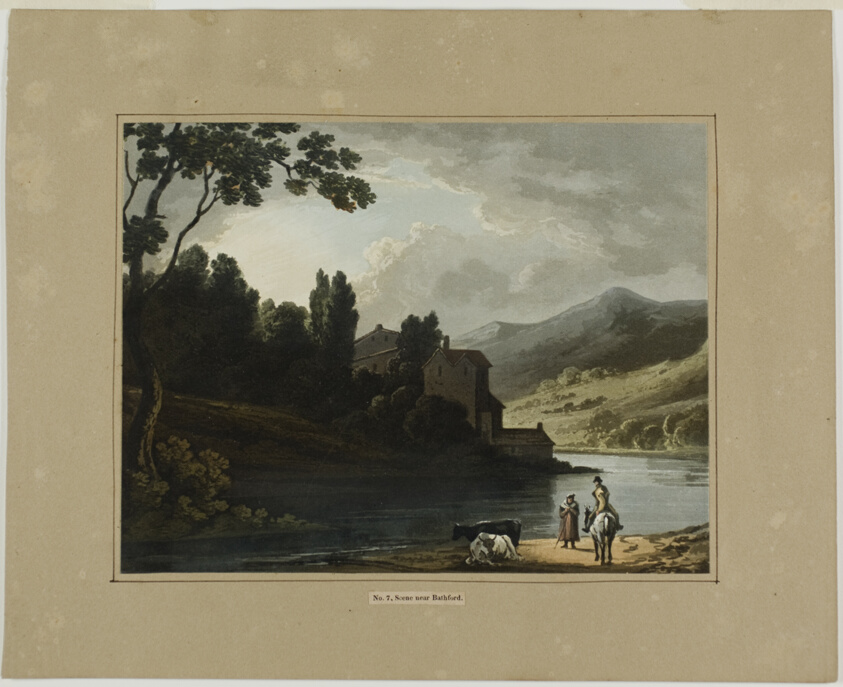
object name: Print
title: Scene near Bathford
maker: E. Parker (English); after Thomas Barker (English, 1769-1847)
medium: Aquatint colored by hand, on paper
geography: England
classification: aquatint; print; prints and drawing